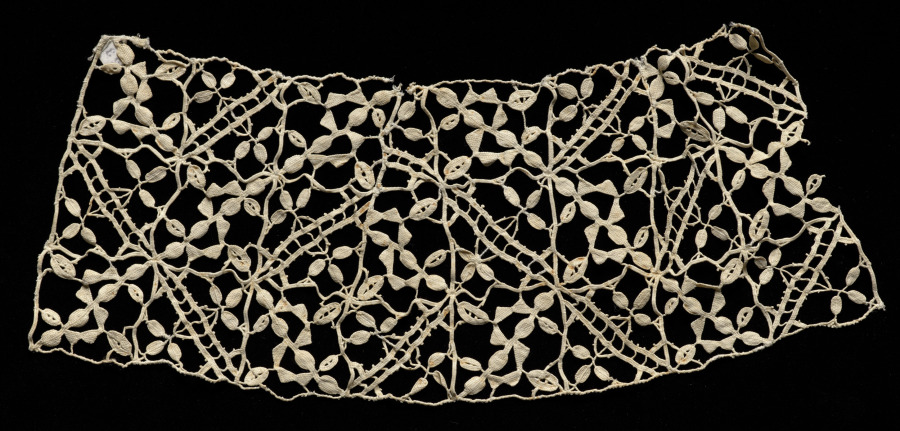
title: Lace Collar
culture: Italy, Genoa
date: 1560–99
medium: Needle lace (Punto in aria)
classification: Lace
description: This Punto in aria collar is based on a Reticella design.